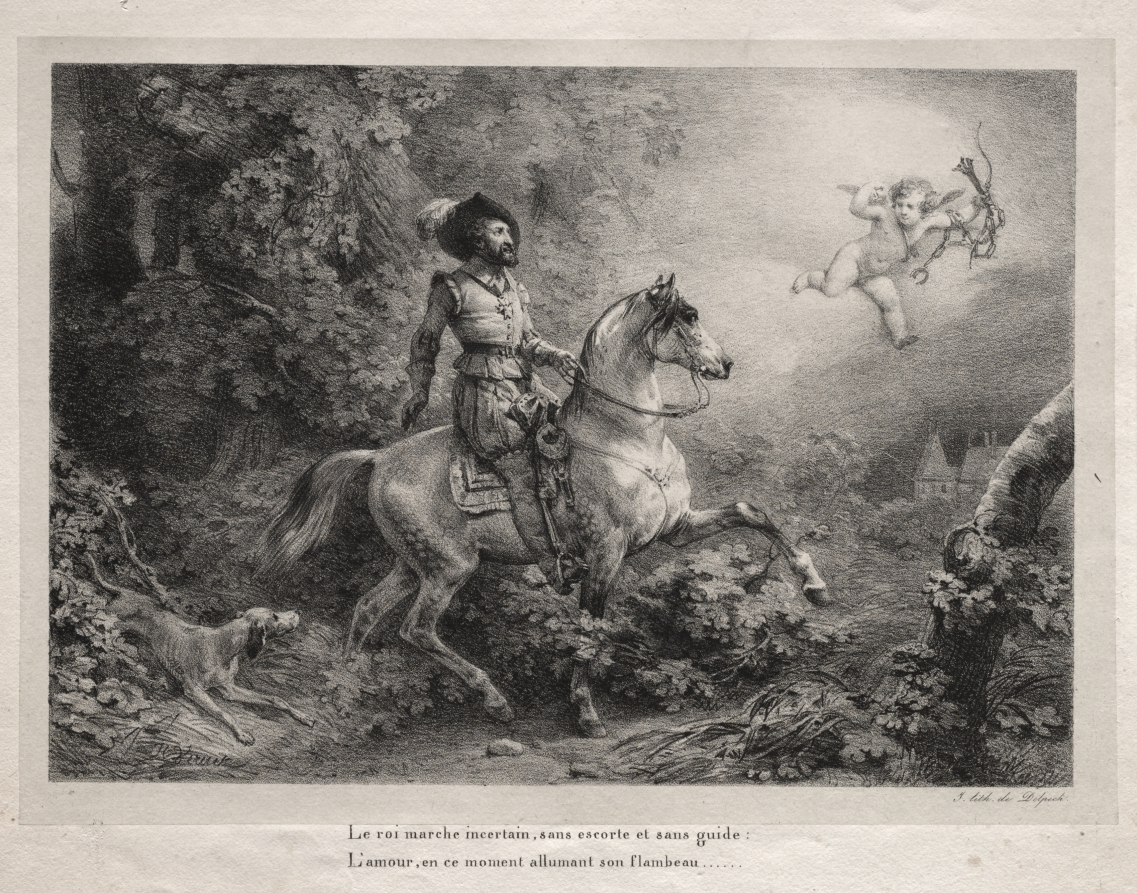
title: Henry IV Rides to the Château d'Anet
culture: France, 19th century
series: Voltaire's La Henriade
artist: Horace Vernet (French, 1789–1863)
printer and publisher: Delpech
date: 1825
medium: lithograph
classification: Print